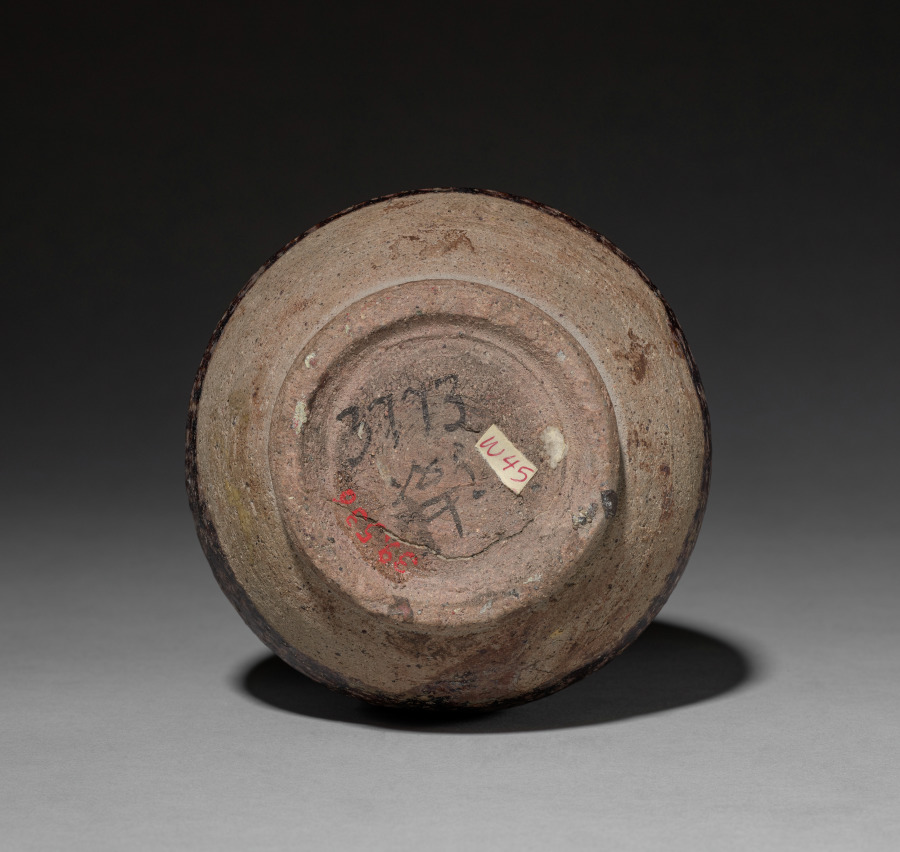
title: Bottle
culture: Siam, Sawankhalok ware, late 13th-14th Century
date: late 1200s-1300s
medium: stoneware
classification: Ceramic